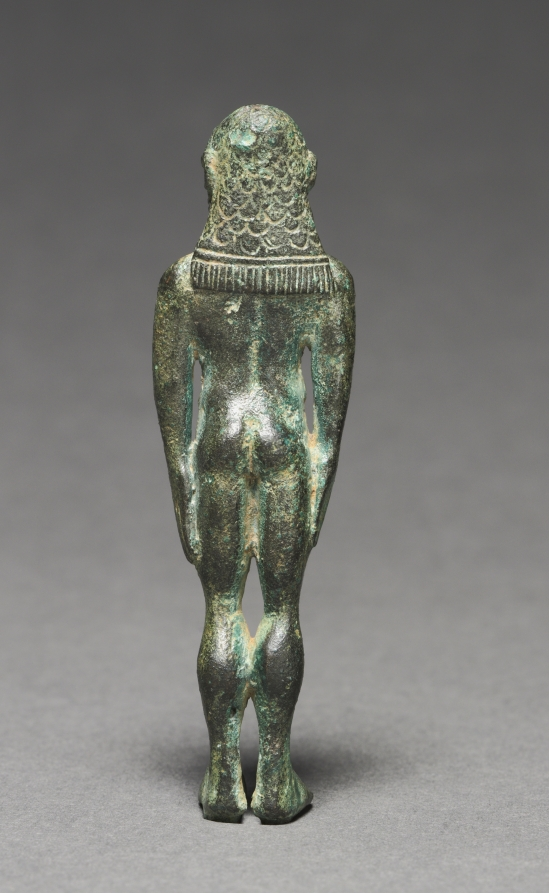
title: Statuette of a Kouros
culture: Etruscan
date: 600–480 BCE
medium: bronze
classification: Sculpture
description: Though almost certainly Etruscan in origin, this small-scale bronze takes the form of a Greek kouros, a nude male youth with arms at sides looking straight ahead. The left foot appears ever so slightly advanced, but not enough to create any real sense of movement. Two long locks of hair fall over each shoulder, recalling Ionian (East Greek) examples, but the scale-like pattern on the back of the head is unusual. Despite the lack of nudity in most other Archaic Etruscan artworks, the kouros became quite popular as a small bronze votive type in Etruria.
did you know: Unlike Greek kouroi, which range in medium and scale, Etruscan kouroi are primarily small bronzes.